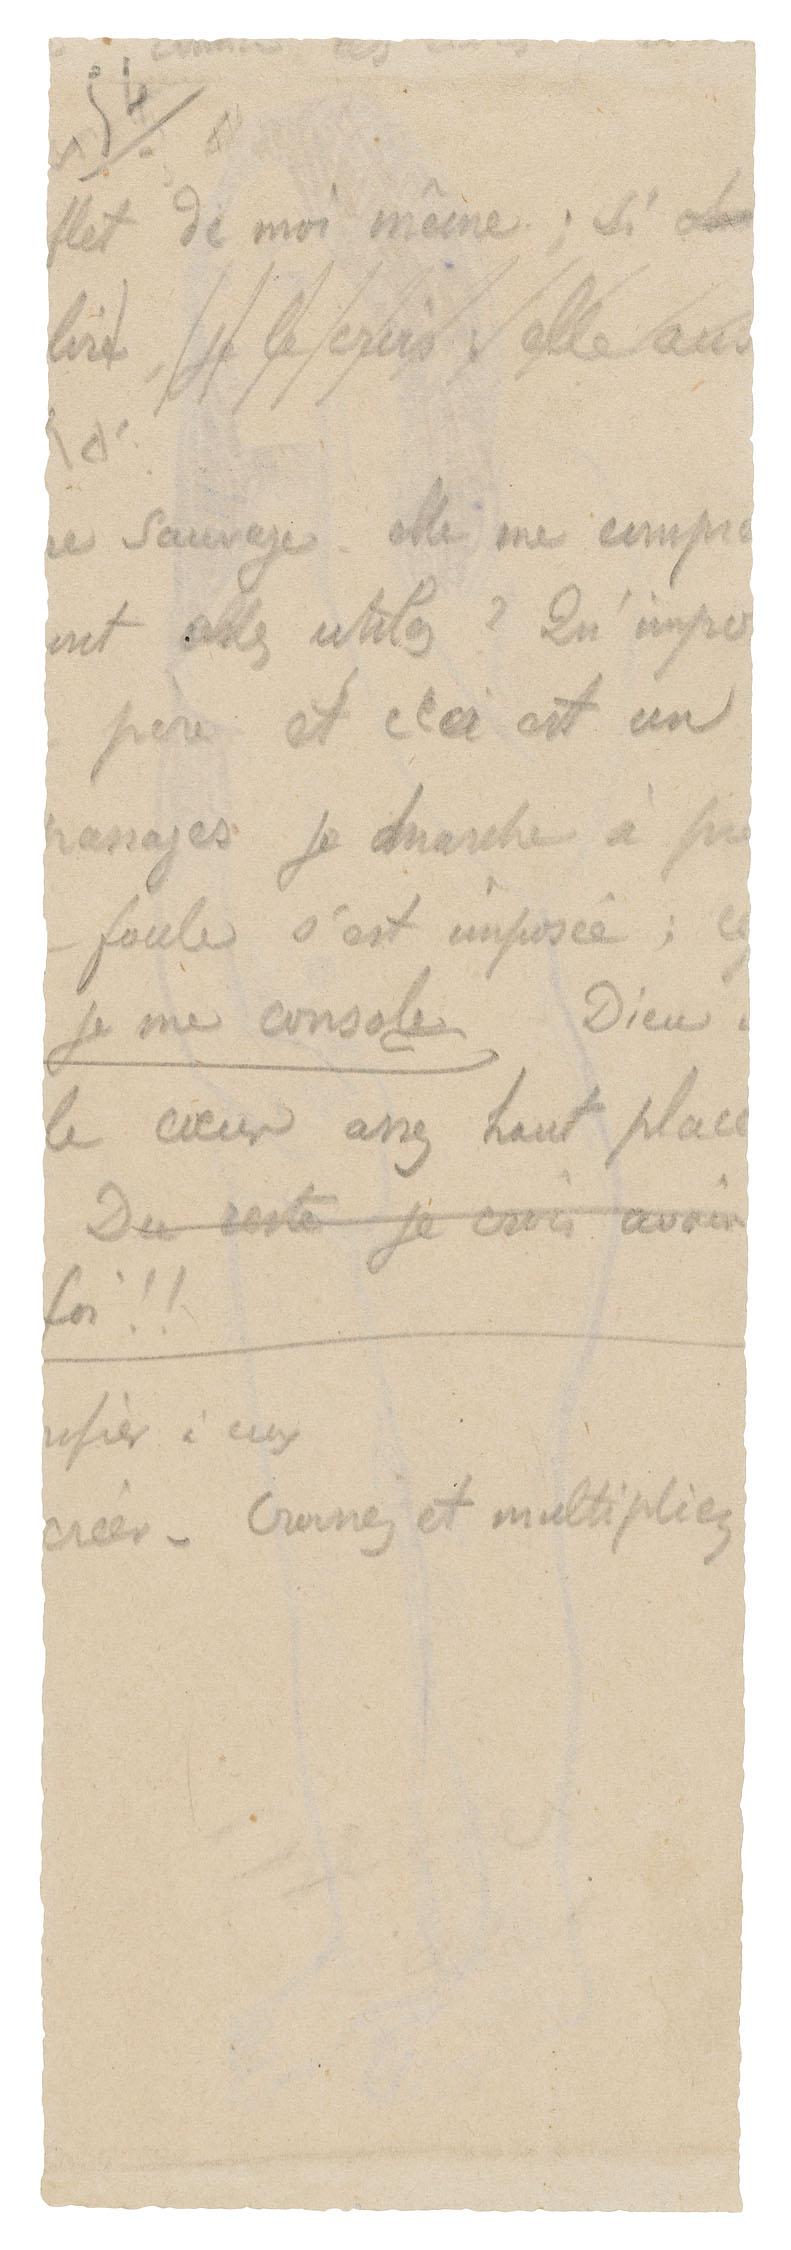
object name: Drawing and Watercolor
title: Fragment of Long Inscription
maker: Paul Gauguin (French, 1848-1903)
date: c. 1895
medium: Graphite on cream wove paper, discolored to tan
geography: France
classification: drawings (visual works); prints and drawing